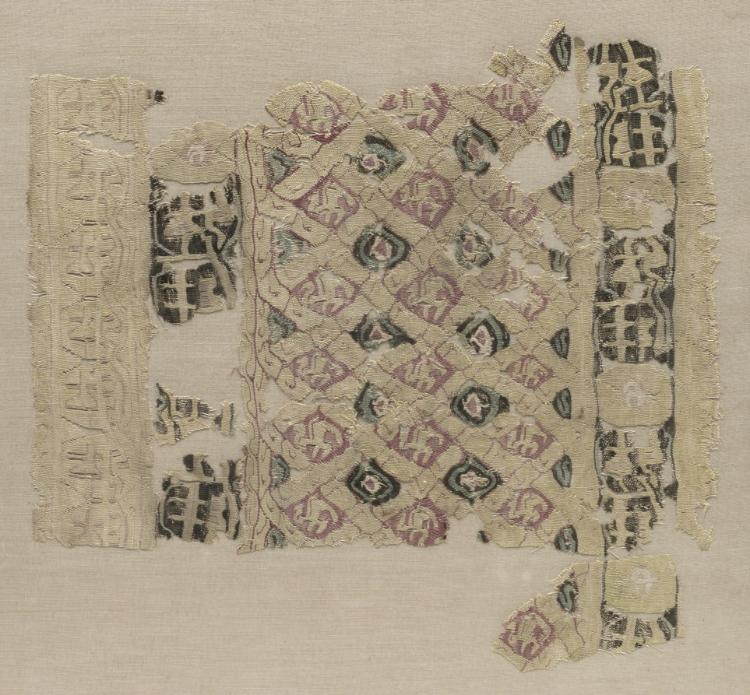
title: Fragment of a Tiraz-Style Textile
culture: Egypt, Fatimid period, Caliphate of al-Amir or al-Hafiz, AH 495-544 (A.D. 1101-1149)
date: 1101 – 1149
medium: tapestry (originally inwoven in tabby ground); linen and wool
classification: Textile